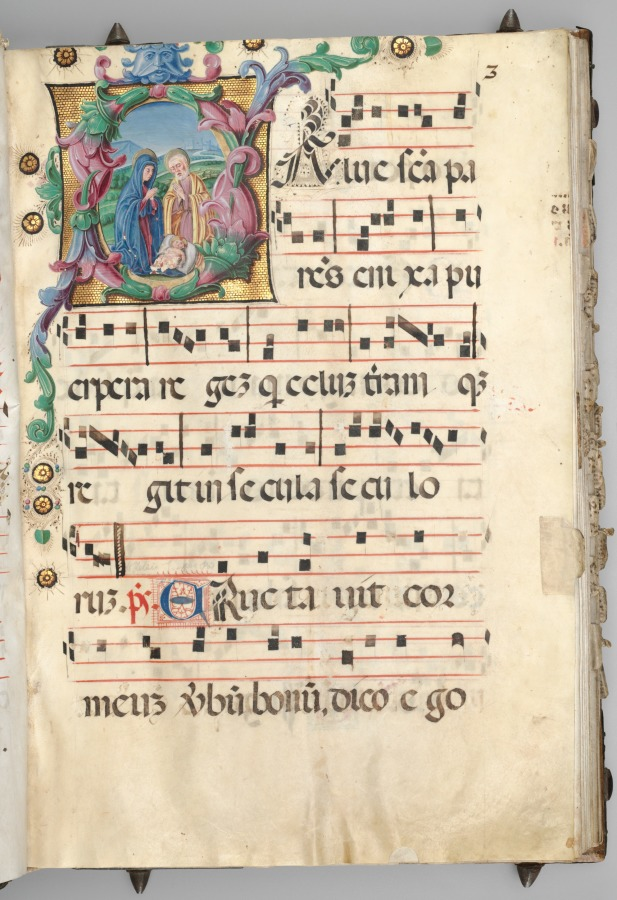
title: Gradual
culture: Italy, Verona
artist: circle of Girolamo dai Libri (Italian, 1474–1555)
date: c. 1520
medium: ink, tempera, and gold on parchment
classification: Manuscript